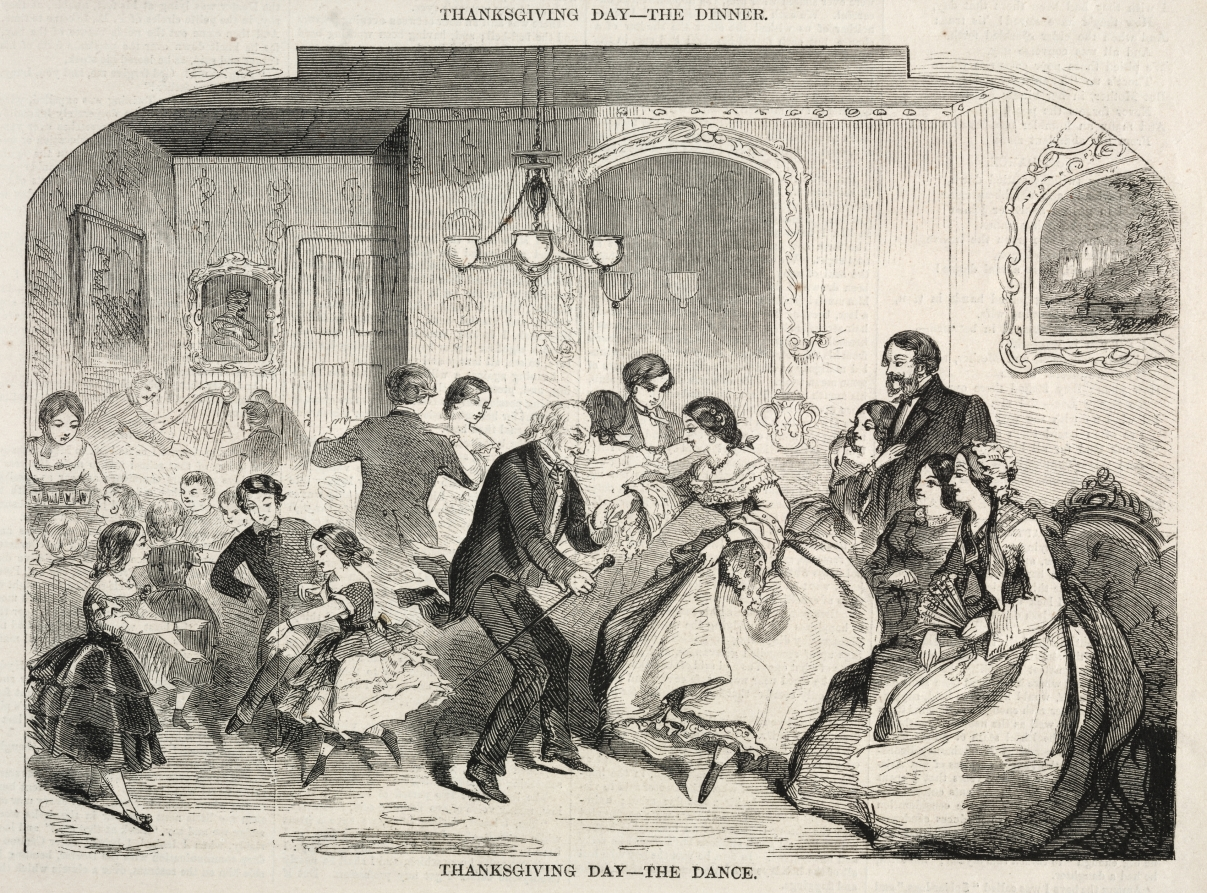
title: Thanksgiving Day - The Dance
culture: America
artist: Winslow Homer (American, 1836–1910)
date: 1858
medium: wood engraving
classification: Print